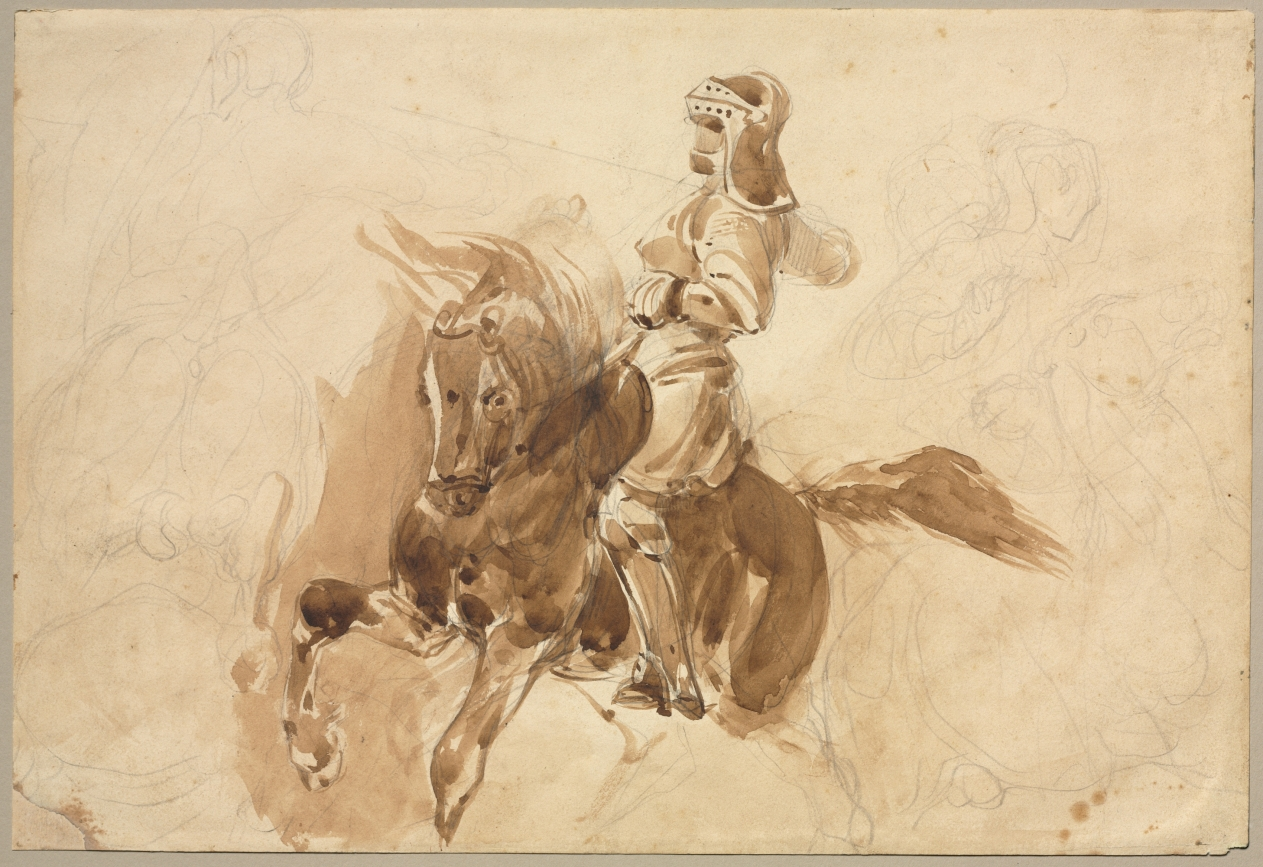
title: Armored Figure on Horseback (recto)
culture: France, 19th century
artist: Eugène Delacroix (French, 1798–1863)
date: c. 1828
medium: graphite and brush and brown wash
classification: Drawing